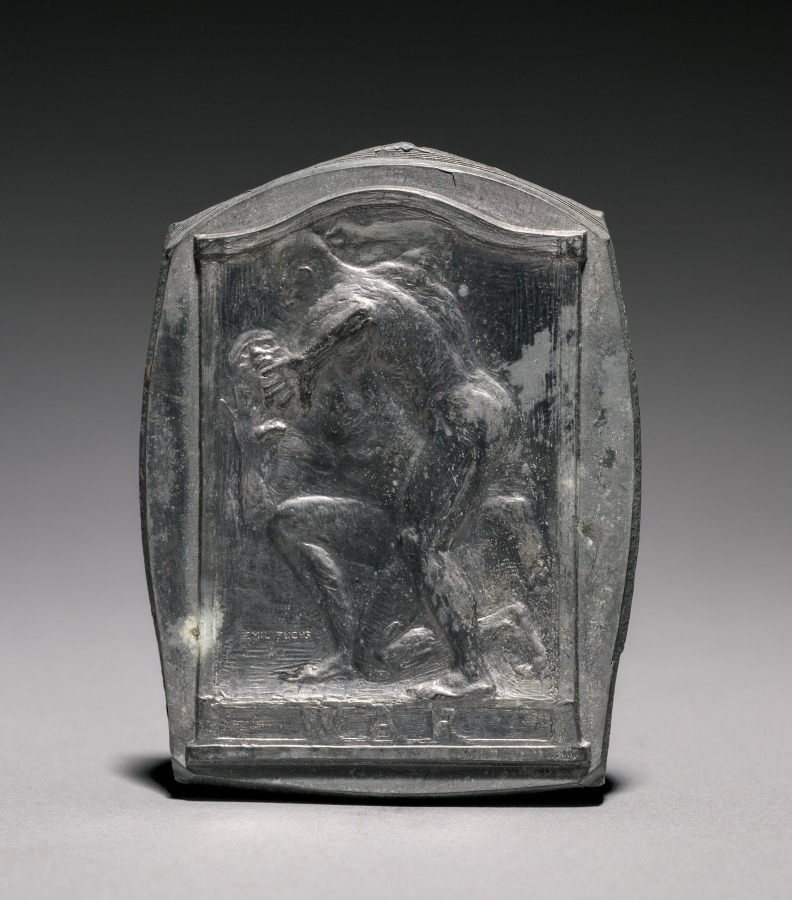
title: Lead Casting of Reverse Side of Peace and War Plaquette: War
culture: America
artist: Emil Fuchs (American, born Austria, 1866–1929)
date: 1913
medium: lead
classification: Metalwork